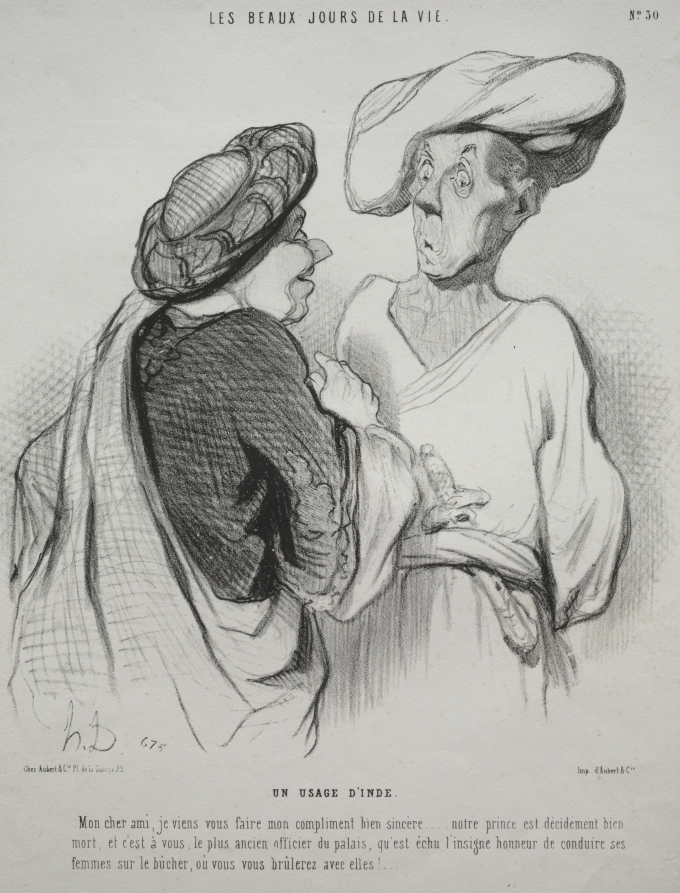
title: An Indian Custom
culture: France, 19th century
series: The Best Days in Life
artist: Honoré Daumier (French, 1808–1879)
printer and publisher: Aubert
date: 1844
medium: lithograph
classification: Print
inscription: Above image, printed: LES BEAUX JOURS DE LA VIE / No. 30 ; below image, printed: UN USAGE D’INDE. / Mon cher ami, je viens vous faire mon compliment bien sincère.... notre prince est décidément bien / mort, et c'est à vous, le plus ancien officier du palais, qu'est échu l'insigne honneur de condiure ses / femmes sur le bûcher, ou vous vous brûlerez avec elles!....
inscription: Upper margin, in pencil: R-G2 v.3-4 / 7 / also with text / 30/100 ; lower margin, printed: Chez Aubert & Cie. Pl. de la Bourse, 29 / Imp. d'Aubert & Cie. ; in pencil: H.D.754 / (Mi-29-2-160) / 9 Nov. 1844 / D.IV.1117 II/II / 40+/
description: This print was published in Le Charivari (November 9, 1844) as plate 30 from the series The Best Days in Life.